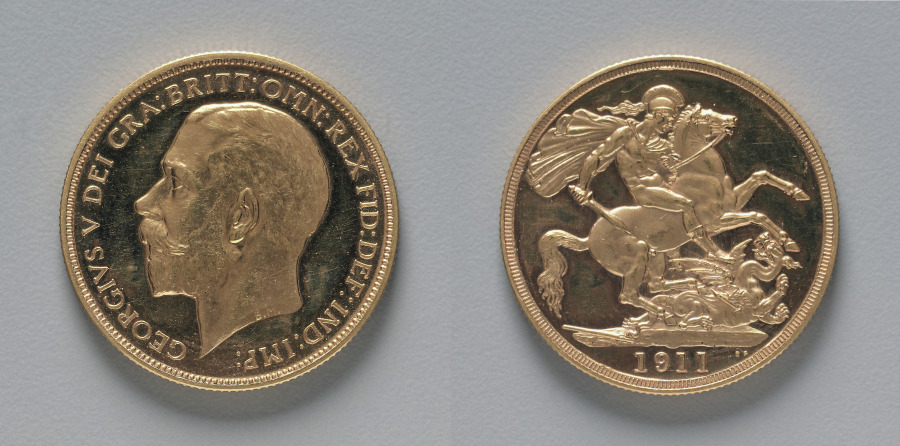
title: Two Pound Piece: George V (obverse); St. George and the Dragon (reverse)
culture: England, George V, 1910-1936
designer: Bertram Mackennal (Australian, 1863–1931)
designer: after Benedetto Pistrucci (Italian, 1784–1855)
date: 1911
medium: gold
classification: Coins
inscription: GEORGIVS V DEI GRA: BRITT: OMN: REX FID: DEF: IND: IMP:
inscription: 1911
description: Benedetto Pistrucci, an Italian gem and coin engraver, is best known for his image of St. George and the Dragon, which is still used on coinage today. Bertram Mackennal, an Australian sculptor and medallist, was reported to be one of the few artists King George V liked and is most famous for designing the king's likeness.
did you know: This piece was struck for inclusion in poof sets, never for circulation.